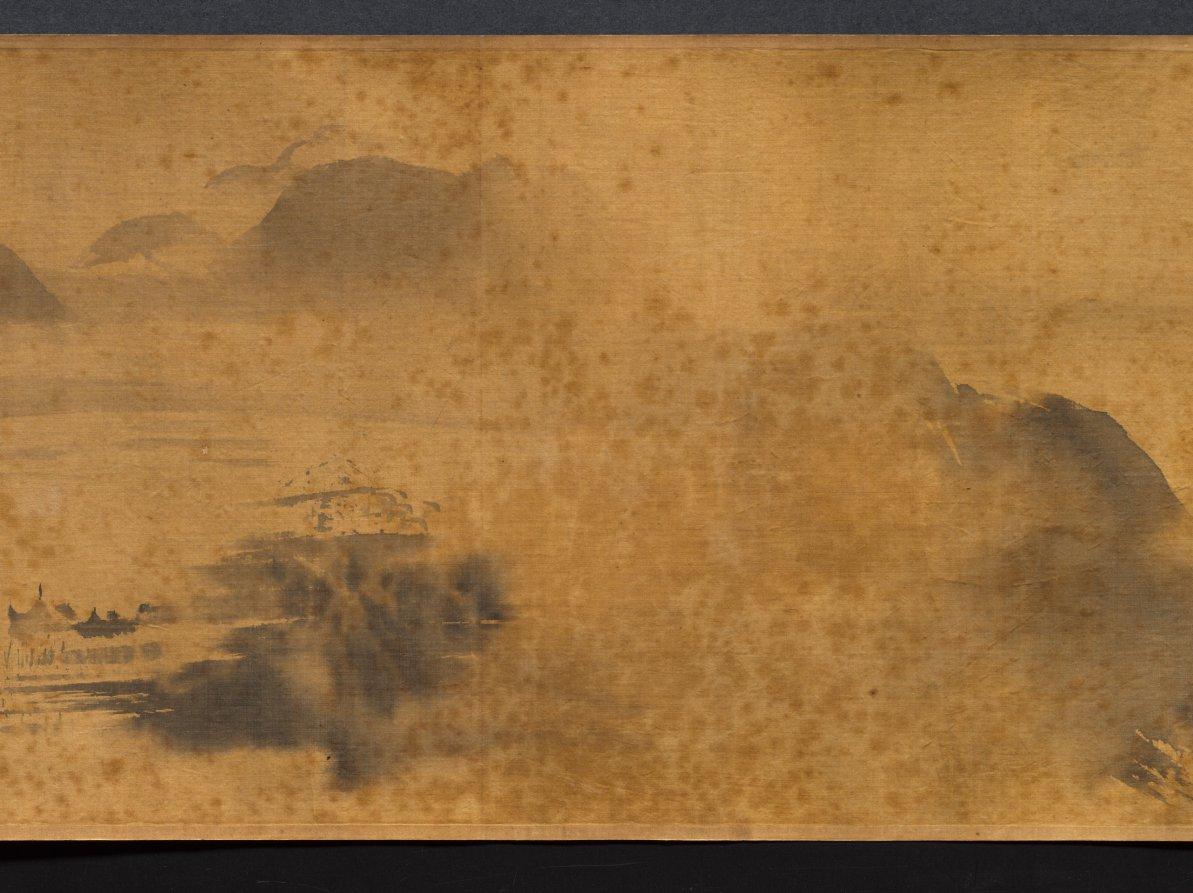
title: Eight Views of Xiao-Xiang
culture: Japan, Edo period (1615–1868)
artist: Kano Tan’yū (Japanese, 1602–1674)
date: 1615–1868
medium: handscroll; ink on silk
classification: Painting